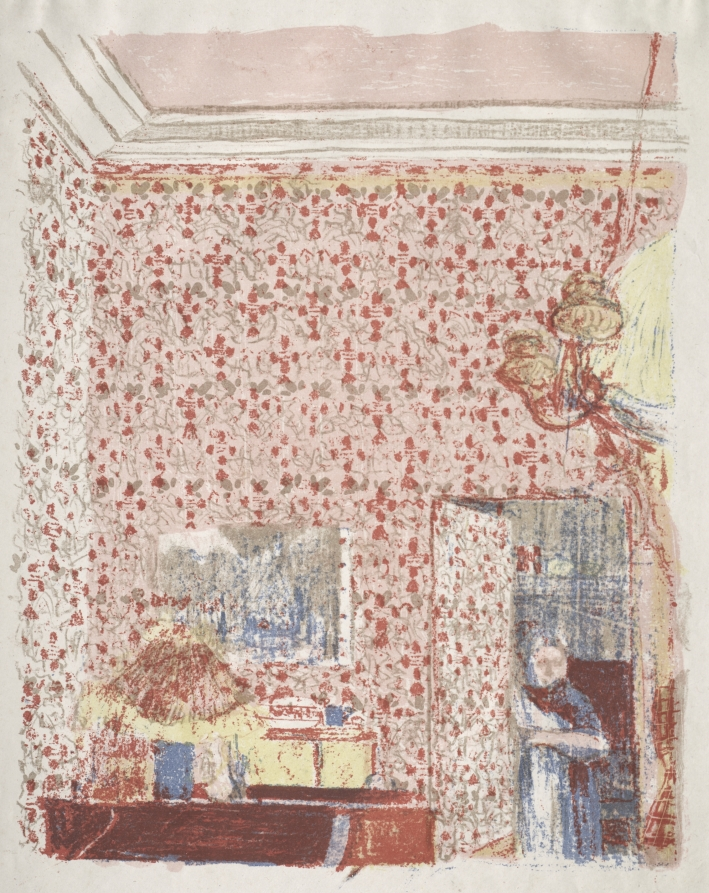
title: Interior with Pink Wallpaper I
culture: France, 19th century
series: Landscapes and Interiors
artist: Édouard Vuillard (French, 1868–1940)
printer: Auguste Clot (French, 1858–1936)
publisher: Ambroise Vollard (French, 1867–1939)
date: 1899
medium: color lithograph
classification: Print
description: The optical beauty of the patterning and luscious color of Interior with Wallpaper I, II, and III distracts from their ambivalent undercurrents. Across the three sheets, Vuillard creates an airless enclosure in which the wallpaper replicates itself, metastasizing across the surface and threatening the figures partially glimpsed through interior doors. Hidden figures recur in Vuillard’s work, adding an element of the uncanny to familiar settings.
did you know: Vuillard’s mother, Madame Marie Vuillard, appeared in over 500 of her son’s paintings and prints made between the 1880s and 1920s.